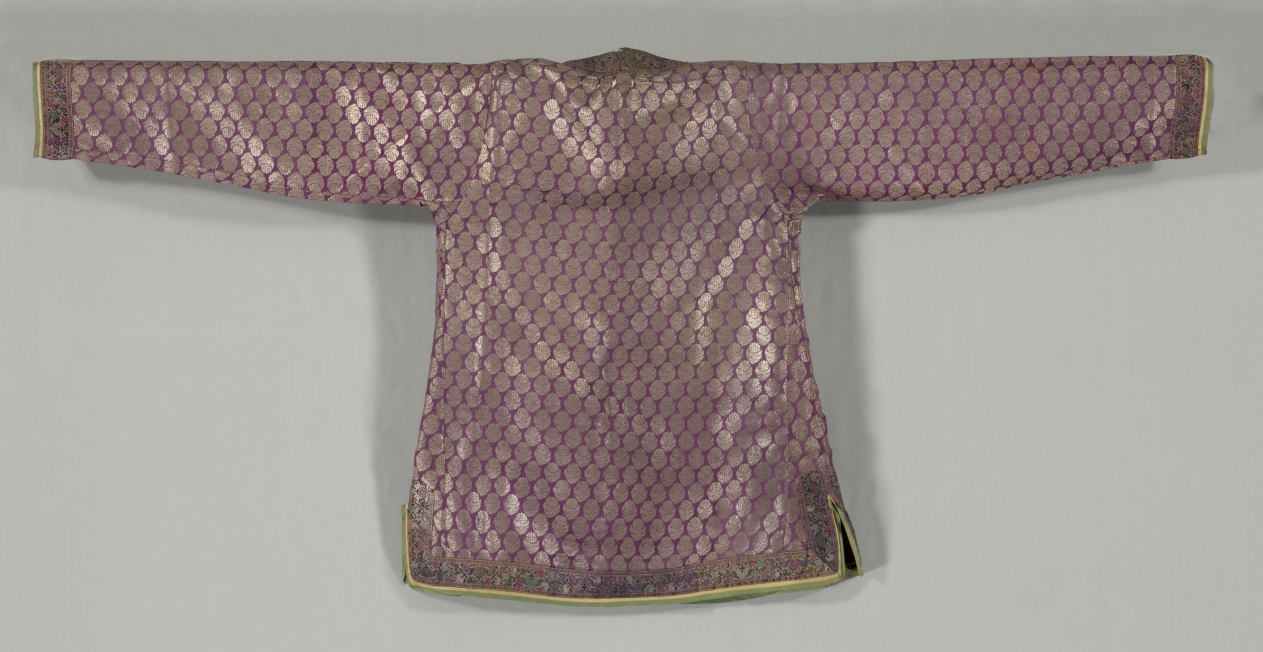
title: Man's Coat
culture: India, Early 19th century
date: c. 1800–1825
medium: brocade, cotton lining, metal thread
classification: Garment